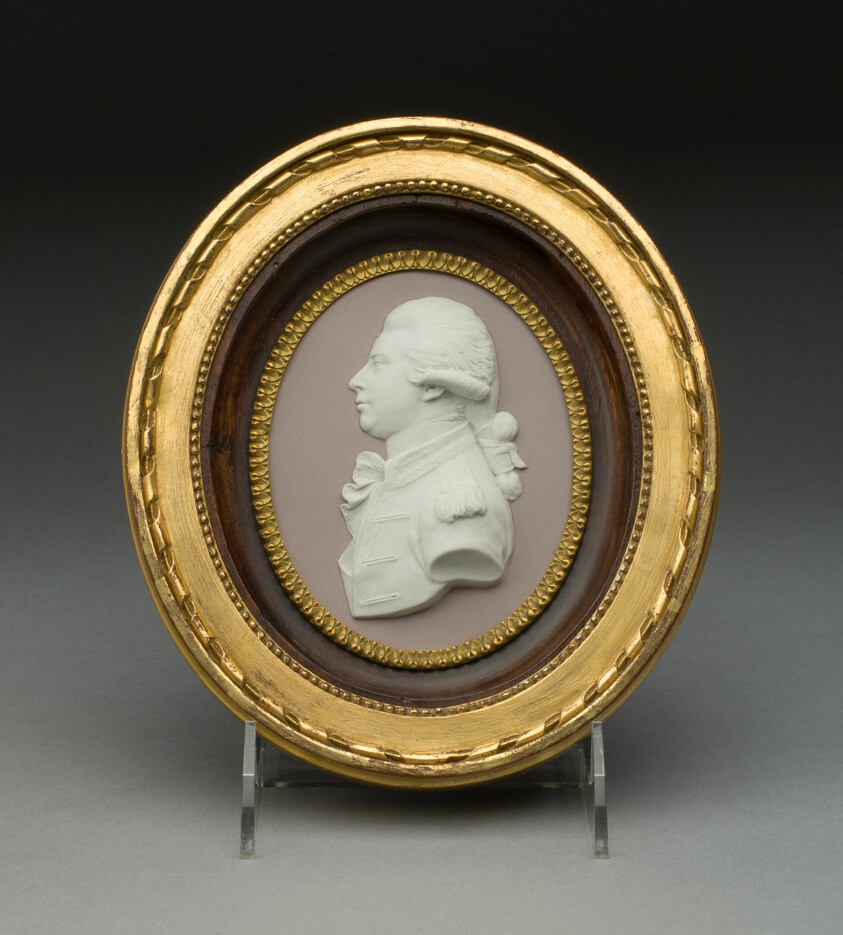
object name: Ceramics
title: Plaque with Portrait of George Augustus Frederick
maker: Wedgwood Manufactory (England, founded 1759)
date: c. 1790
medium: Stoneware (jasperware)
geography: Burslem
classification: sculpture; stoneware; european decorative arts; ceramics